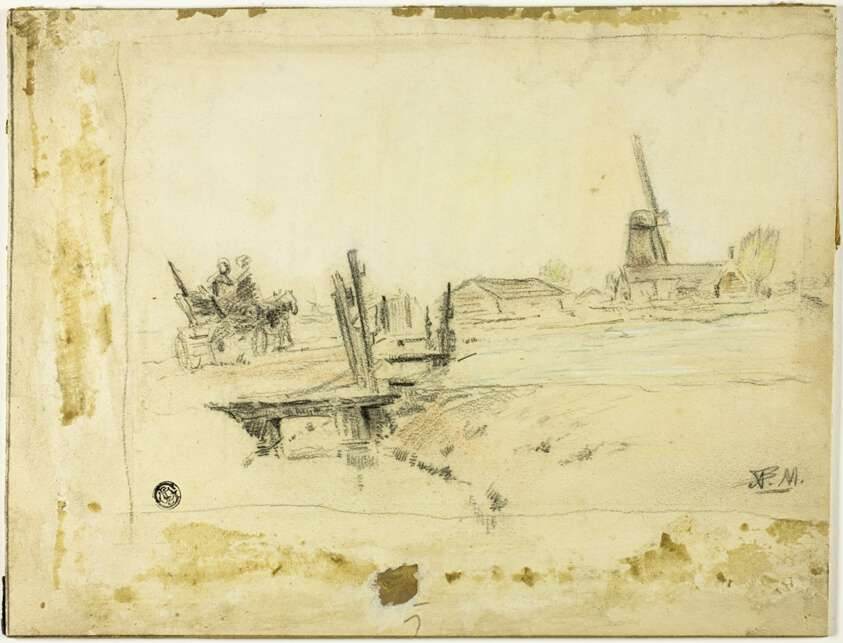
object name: Drawing and Watercolor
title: Dutch Landscape: Horse and Wagon Crossing Bridge Towards Windmill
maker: Possibly Anton Mauve; Dutch, 1838-1888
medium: Pastel, on ivory wove paper, laid down on board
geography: Holland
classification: charcoal; drawings (visual works); prints and drawing